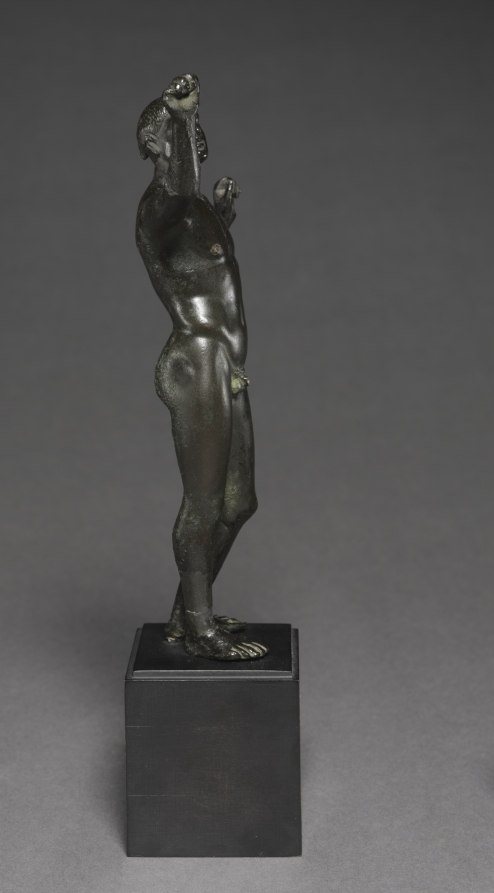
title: Boxer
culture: Greece, Greco-Roman Period, late Ptolemaic Dynasty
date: 100–30 BCE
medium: bronze. solid cast, with copper inlays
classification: Sculpture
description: This boxer raises his arms to pull tight the thongs (now lost) that Greek and Roman boxers wound around their hands for protection. The sinuous body curve and long proportions are characteristic of the late Hellenistic period, when artists created more elongated versions of athletes and other classical figures.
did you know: The long topknot (cirrus) identifies this athlete as a hand-to-hand fighter, most likely a boxer.